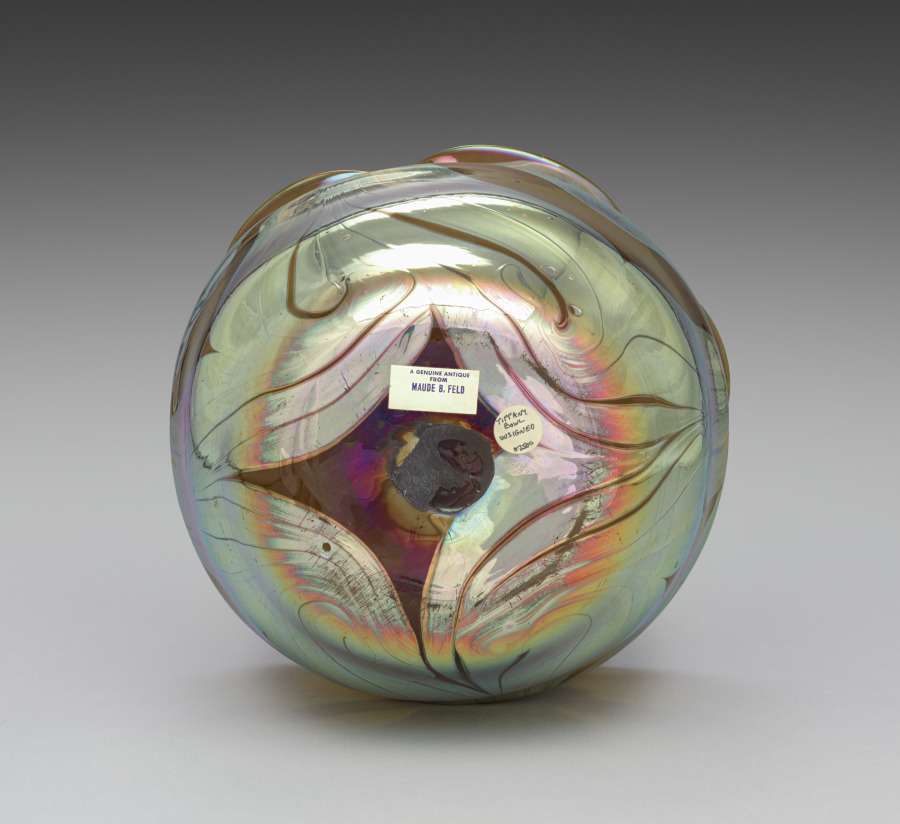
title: Bowl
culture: America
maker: Tiffany Glass & Decorating Company (America, New York, 1892–1902)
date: c. 1896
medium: Favrile glass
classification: Glass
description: Among his many achievements in the decorative arts, Louis Comfort Tiffany invented a type of glass with unprecedented opalescence that he patented under the name Favrile, derived from an Old English word meaning "handcrafted." Tiffany memorably described his Favrile glass as "distinguished by brilliant or deeply toned colors, usually iridescent like the wings of certain American butterflies, the necks of pigeons and peacocks, the wing covers of various beetles."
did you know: Located in Lake View Cemetery in Cleveland, Wade Memorial Chapel features an interior designed by Tiffany.